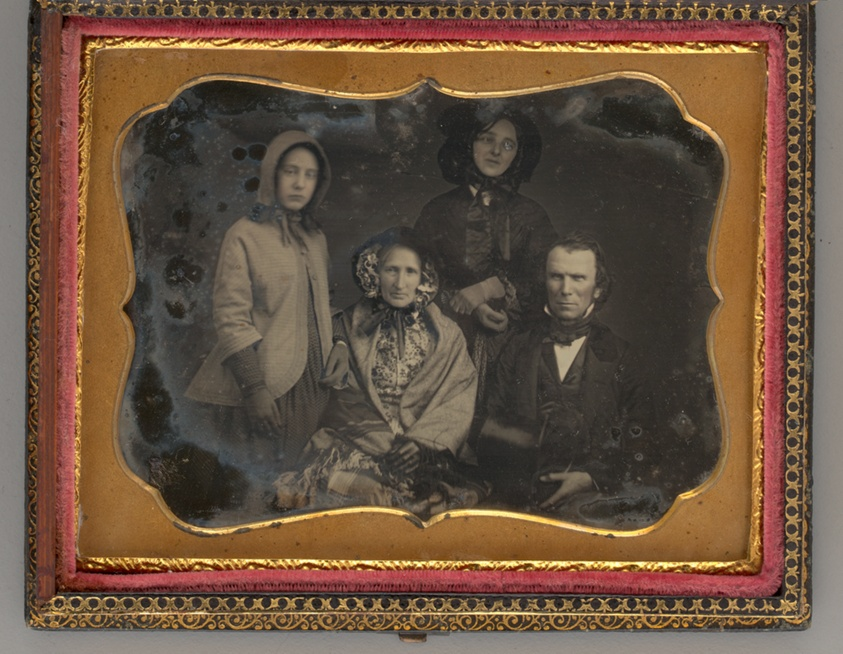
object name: Photograph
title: Untitled (Portrait of Three Woman and a Man)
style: 19th century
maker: Unknown maker; American, 19th century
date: 1858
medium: Daguerreotype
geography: United States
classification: portrait; photograph; photographic process; photography; portrait; daguerreotype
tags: lundberg collection, portraits, portraits: child subject, families, family, people, portrait, portraits: multiple subjects